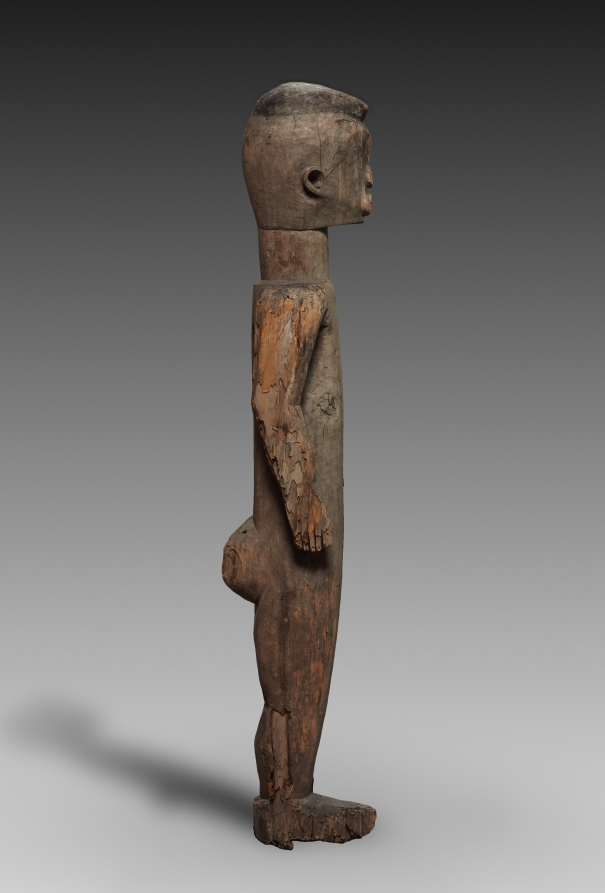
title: Figure of a Pair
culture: Africa, Central Africa, Democratic Republic of the Congo or Central African Republic (most likely), possibly Monzombo-style maker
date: late 1800s–early 1900s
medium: Wood and iron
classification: Sculpture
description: The Ubangi region's history of successive migrations and assimilations has resulted in numerous exchanges of religious beliefs and ritual practices. Despite some stylistic traits, including the heart-shaped faces and the male's crested coiffure, this figure with its female pair is unlike any other in the Ubangian corpus. Based on indirect evidence, the pair is said to represent the culture's primordial couple.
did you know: This pair is of a male and female and is said to represent the culture's primordial couple. There are no other carved mother-child figures that originate from the Monzombo ethnic group.